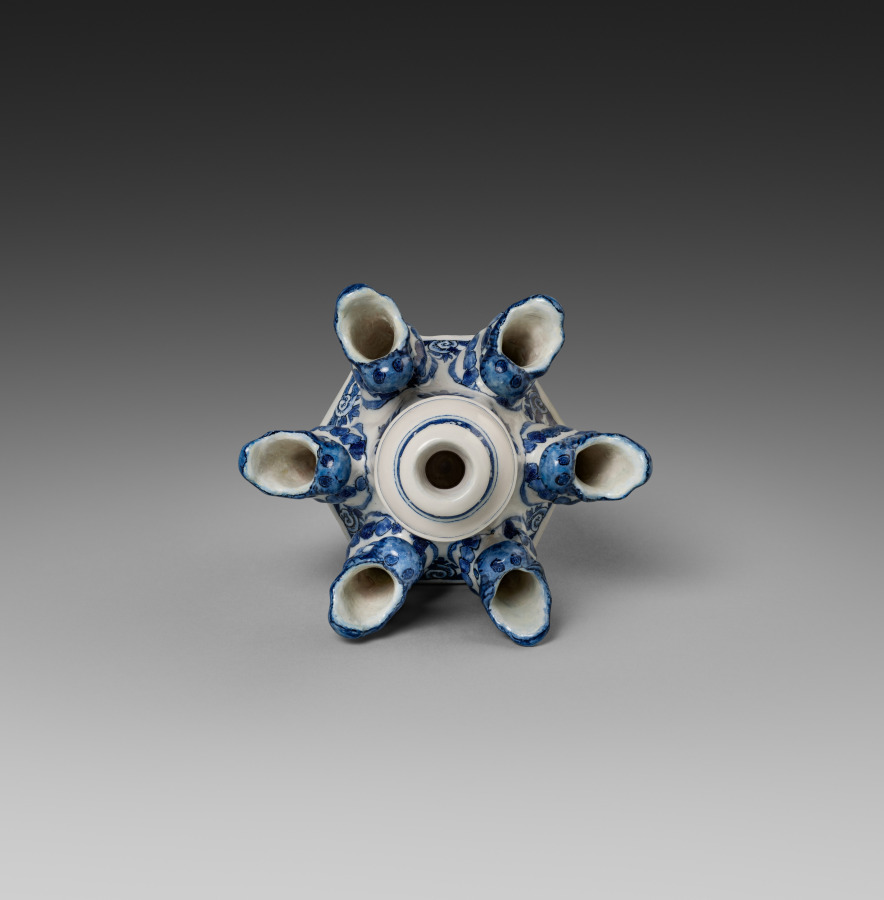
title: Sixth Tier for a Flower Pyramid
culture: Netherlands, Holland, Delft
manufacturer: Adrianus Kocx (Dutch, active 1686–1701)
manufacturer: De Grieksche A (The Greek A) Factory (Netherlands, 1658–1811)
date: c. 1690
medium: Tin-glazed earthenware, painted in blue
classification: Ceramic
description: Allegorical figures representing Faith, Hope, and Love decorate the base of this pyramid, on which rest six tiers with spouts where flowers can be placed. Flower pyramids are among the most complex and luxurious types of ceramics produced in Delft in the late 1600s. This example was made in the Greek A Factory, owned by Adrianus Kocx. During his tenure, the factory became the most prestigious of Delft potteries and received commissions from Queen Mary II, who ruled over England, Scotland, and Ireland together with her husband, William III. She contributed to the international spread of the fashion for Delft ceramics.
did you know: The iconic blue-and-white ceramics from Delft originated as an attempt to copy Chinese porcelain.